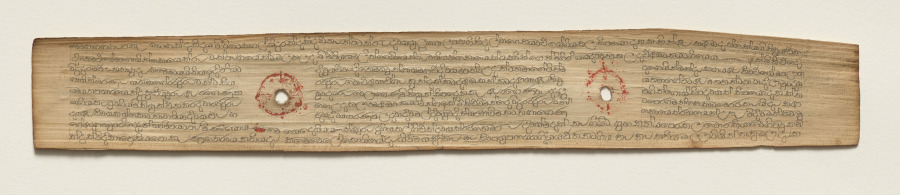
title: Leaf from a Buddhist Manuscript (verso)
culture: Sri Lanka, Singhalese, Late 17th century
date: c. 1700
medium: fiber paper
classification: Manuscript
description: Palm leaf material is still used for manuscripts in Sri Lanka. The palm leaves are prepared first by boiling them, drying them in the sun, and then rubbing them with oils. Scribes then use a metal stylus to incise the text. Then charcoal powder is wiped across the pages, filling in only the inscribed lines.